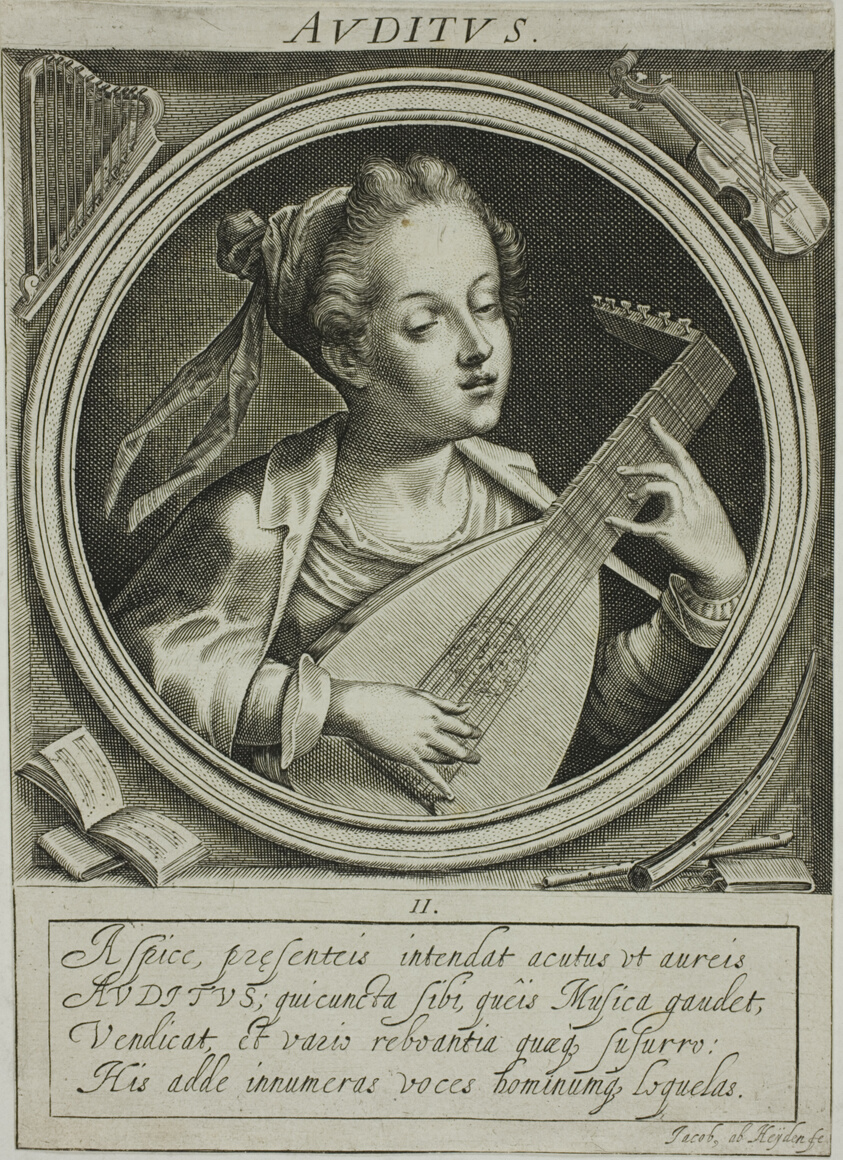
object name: Print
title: Sound, plate two from The Five Senses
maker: Jacob van der Heyden (Flemish, 1573-1645)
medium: Etching and engraving in black on ivory laid paper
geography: Flanders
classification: etching; print; prints and drawing